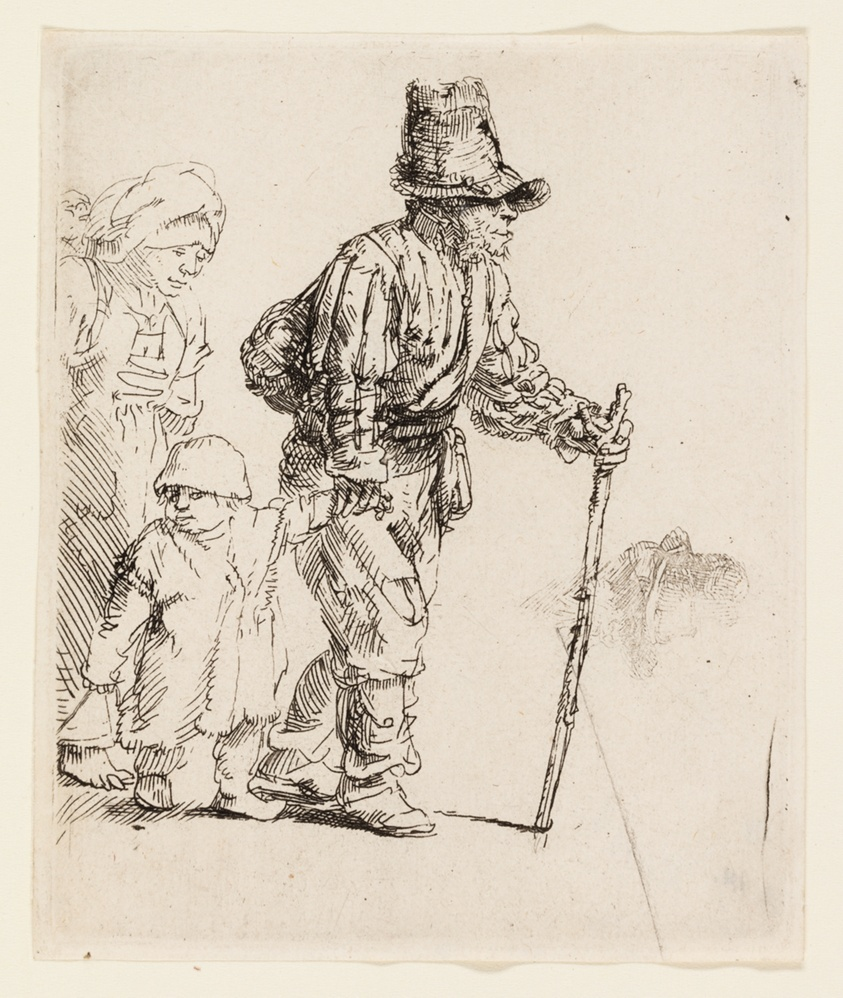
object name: Print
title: Peasant Family on the Tramp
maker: Rembrandt van Rijn (Dutch, 1606-1669)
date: c. 1652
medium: Etching on cream laid paper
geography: Holland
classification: etching; print; prints and drawing; paper